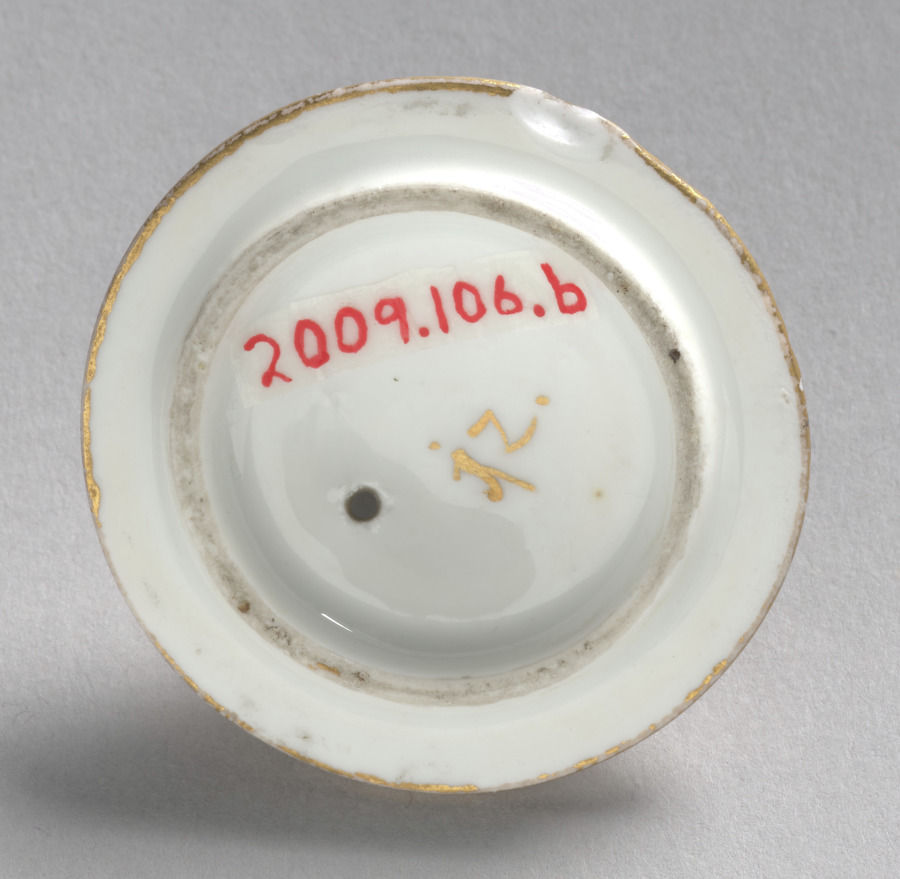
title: Lid for a Teapot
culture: Germany, Meissen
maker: Meissen Porcelain Factory (German, est. c. 1710)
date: c. 1750–70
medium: porcelain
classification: Ceramic